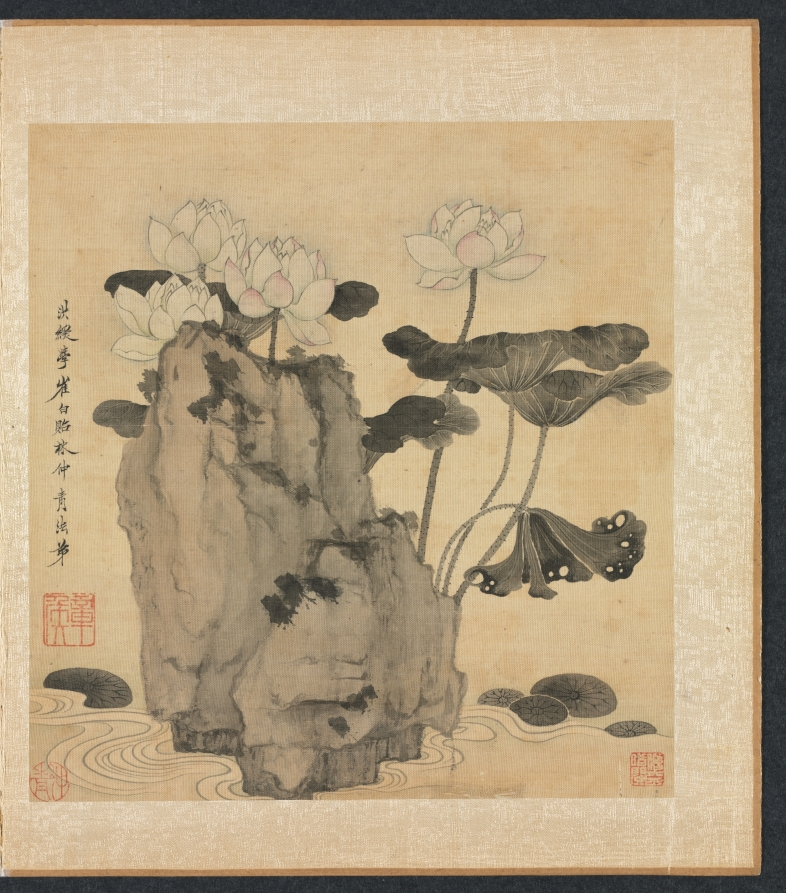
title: Paintings after Ancient Masters: Lotus and Rocks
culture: China, Ming dynasty (1368–1644)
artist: Chen Hongshou (Chinese, 1598/99–1652)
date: 1598–1652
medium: album leaf; ink and color on silk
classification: Painting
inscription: Hongshou painted after the style of Cui Bai [Ts'ui Po] and presented it to the Buddhist disciple Lin Zhongqing. [Seal] Changhou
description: The twenty paintings in this double album by Chen Hongshou include landscapes, figures, and flowers. It also has one leaf featuring a woman, an often-used subject not found in the other albums from the latter part of his career. Chen's late works are wonderful summations of his peculiar and quirky art—archaistic, hyper-refined—but without accompanying shallowness or sentimentality. His figures and landscapes in the late albums are miniaturized, not unlike the small Chinese gardens, or the carefully selected small table rocks or old roots used for contemplation to see the world in miniature. This loss of scale is quite deliberate and reflects the psychological situation of a depressed class like the Ming loyalist officials and scholars, deprived of their integrity and honor, and forced to lead a diminished and restricted existence.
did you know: Chen Hongshou made this double album with twenty paintings for a friend, Lin Zhongqing.